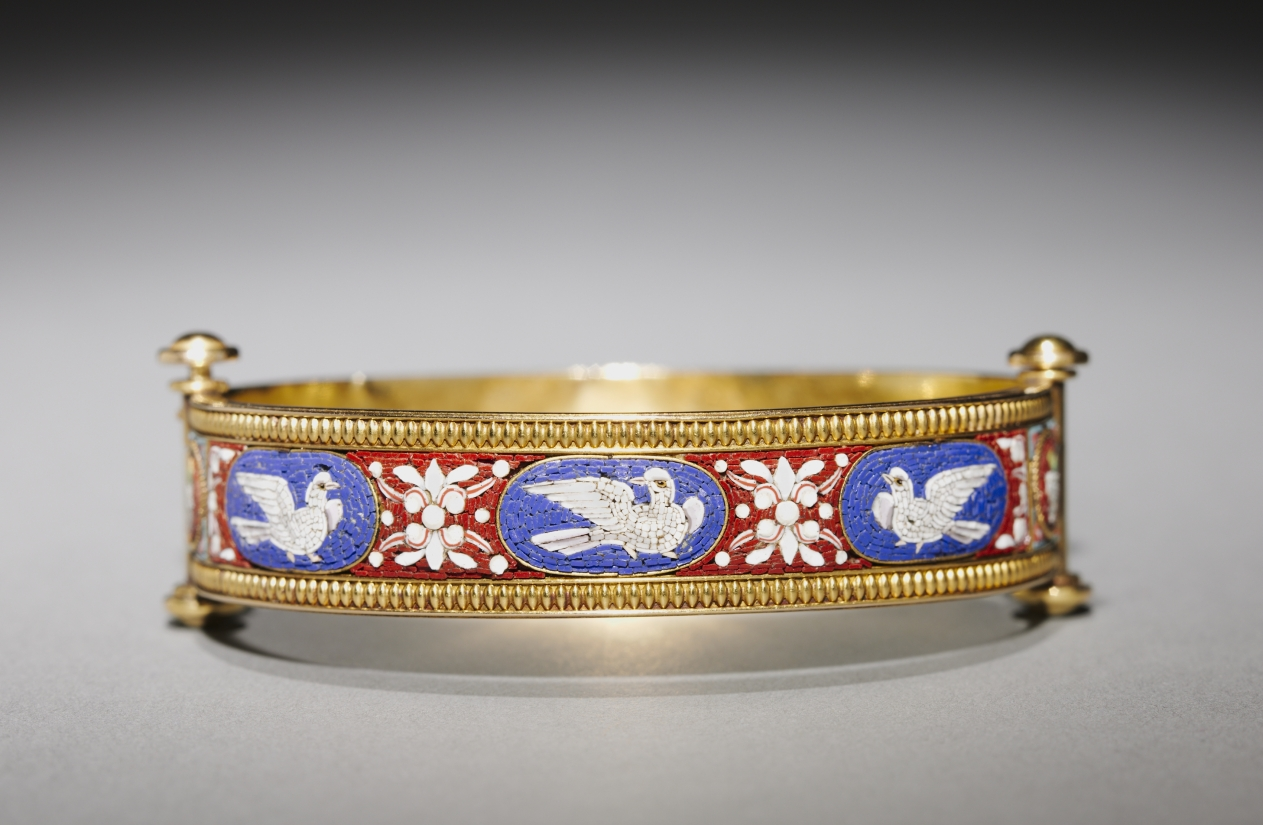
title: Bangle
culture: Italy, Rome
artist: attributed to Fortunato Pio Castellani Firm (Italian)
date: c. 1860–70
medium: gold, glass mosaic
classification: Jewelry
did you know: This bracelet is decorated with tiny tesserae or pieces of glass that create a micro-mosaic.